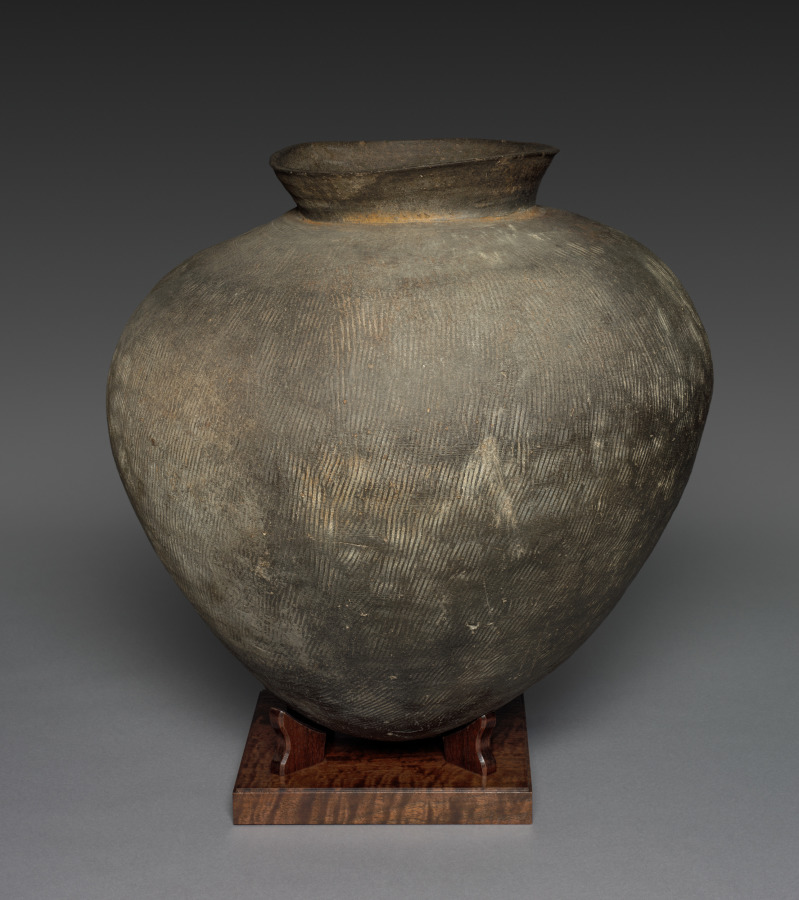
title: Storage Jar: Sueki ware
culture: Japan, Nara period (710–94)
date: 700s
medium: stoneware with incised and impressed decoration and natural ash glaze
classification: Ceramic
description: This robust vessel was formed from clay coils that were beaten inside and out with wooden paddles to compress the body walls and merge the coils. In addition, the exterior surface was paddled and scored with carved wooden tools to decorate the body walls. Finally, the vessel was turned on a potter's wheel to attach the neck with a smoothly finished surface. A high firing (approximately 1000°), which culminated with a reduced oxygen phase, produced the dark gray surface tone. Sueki ware ceramics originated in the mid-400s, when Korean potters and kiln builders established clusters of kilns in the modern Osaka area. Other production centers were established in the outlying provinces by the late 500s, providing for the diffusion of this ceramic ware throughout the country into the 1000s. Sueki wares demonstrate ancient Japan's close cultural ties with the Korean peninsula. Similar vessels have been recovered from sites in the southern regions of the Korean peninsula.